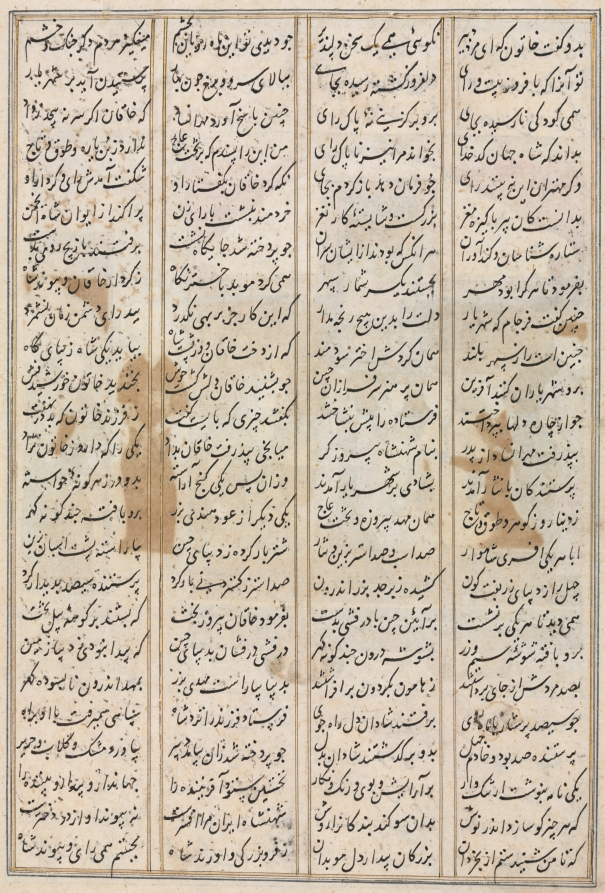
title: The Forty-Eighth Year of Nushirwan's Reign: the Combat of the Khaqan of China with the Haithalians (verso) from a Shahnama (Book of Kings) of Firdausi (940–1019 or 1025)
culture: Iran, Shiraz, Timurid period (1370-1501)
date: c. 1482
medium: opaque watercolor, ink, and gold on paper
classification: Manuscript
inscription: Script: Nasta'liq